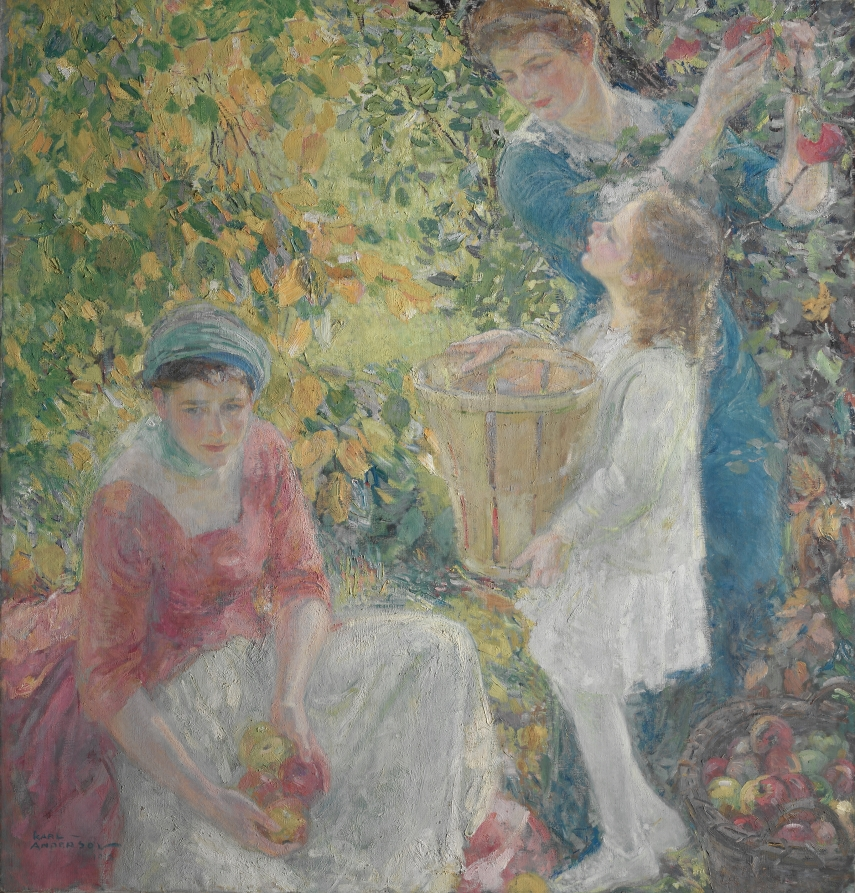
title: The Apple Gatherers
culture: America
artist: Karl Anderson (American, 1874–1956)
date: 1912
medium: oil on canvas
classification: Painting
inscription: Signed lower left: KARL/ANDERSON/1912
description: Karl Anderson disliked the industrialized cities of his day and opted to paint rural settings seemingly untouched by modern development. The leisurely activity of apple picking contrasts with demanding work in urban factories, and the young girl dressed in all white may represent idealized innocence. The artist stated that his paintings were meant to capture “the fragrance of the beauty of life.”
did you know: The apple variety depicted in this painting is the McIntosh, which today accounts for two-thirds of New England’s annual apple harvest.